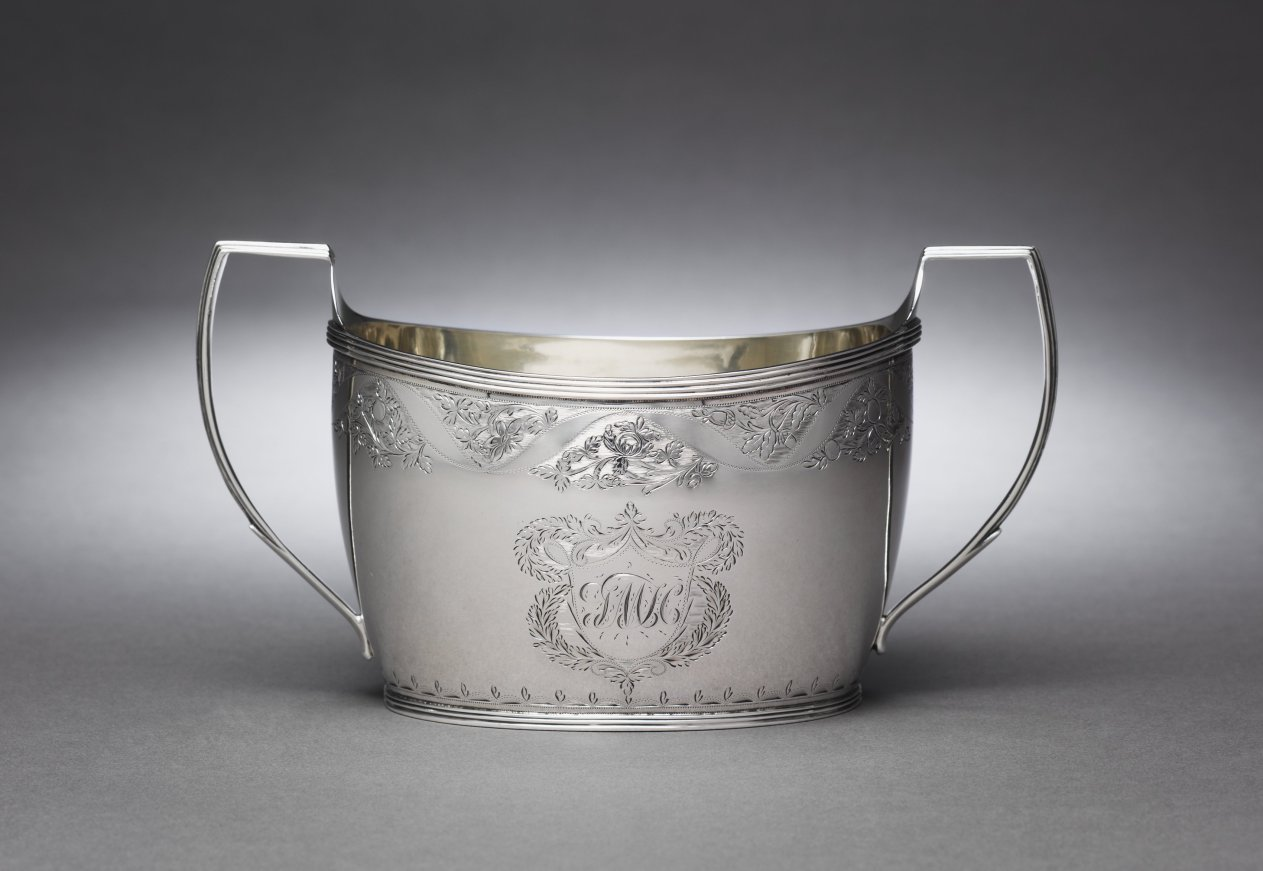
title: Tea Service (Sugar Bowl)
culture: London, England, 19th century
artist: Anne Bateman (British, 1748–1813)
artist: Peter Bateman (British, 1740–1825)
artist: William (I) Bateman (British, 1774–1850)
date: 1807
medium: silver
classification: Silver